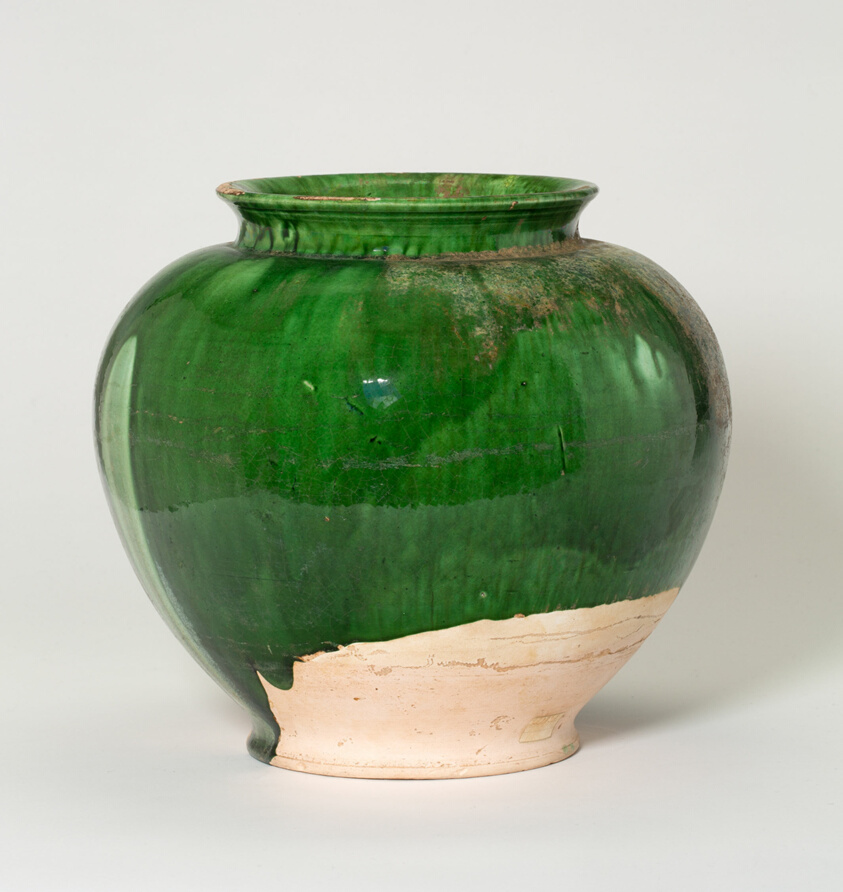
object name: Vessel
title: Jar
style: Chinese (culture or style)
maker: China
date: Tang dynasty (618–906), first half of 8th century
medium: Slip-coated earthenware with green lead glaze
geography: China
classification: earthenware; asian art; ceramics; vessel